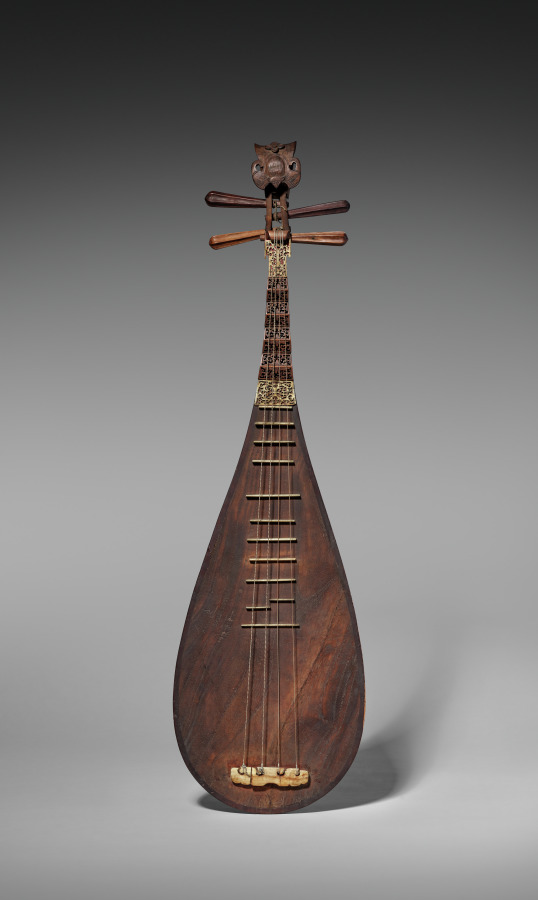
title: Pipa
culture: China, Qing dynasty (1644-1911)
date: 1800s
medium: Wood, ivory, bone, gut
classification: Musical Instrument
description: The term pipa, known since the 3rd century BC, describes the playing motion of the right hand: pi, “to play forward” (left), and pa, “to play backward” (right). A type of lute played with the fingers, it is used in opera and storytelling ensembles and has an impressive, virtuosic solo repertoire. Historic imagery, such as wall paintings, documents the spread of the pipa, along the Silk Road from western and central Asia to China. The bat finial here is a commonly used device on 19th-century Chinese lutes symbolizing good luck.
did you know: The string holder is made of bone.